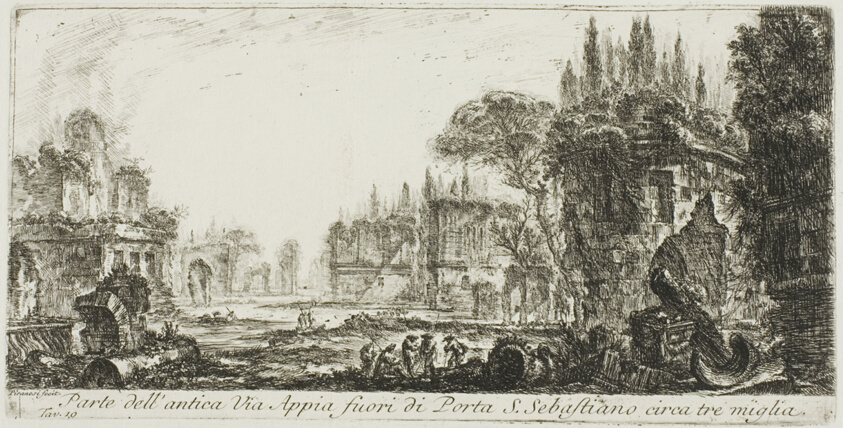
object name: Print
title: Part of the ancient Appian Way about three miles outside Porta S. Sebastiano, plate 19 from Some Views of Triumphal Arches and other monuments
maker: Giovanni Battista Piranesi (Italian, 1720-1778)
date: 1748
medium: Etching on ivory laid paper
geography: Italy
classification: etching; print; prints and drawing